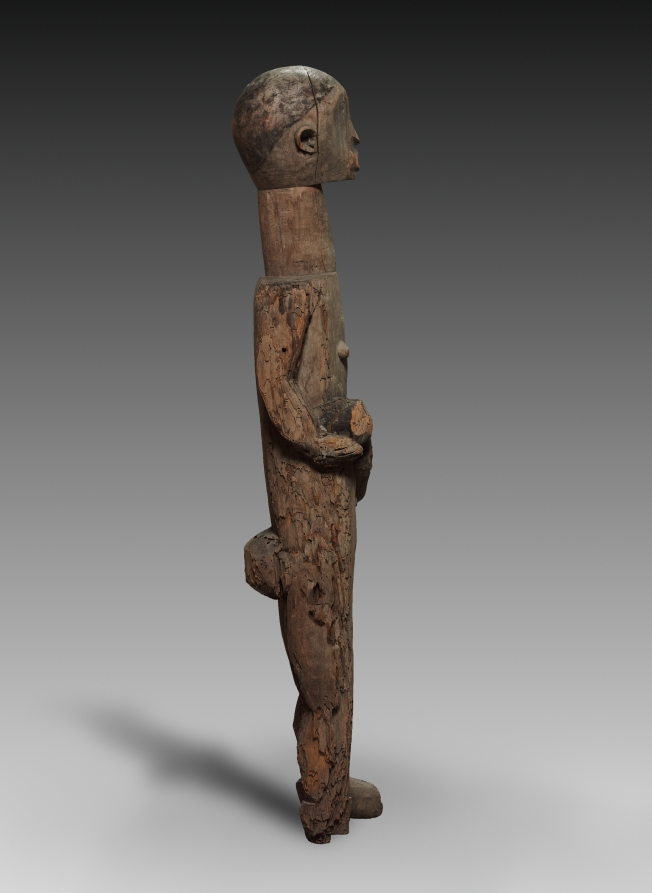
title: Figure of a Pair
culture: Africa, Central Africa, Democratic Republic of the Congo or Central African Republic (most likely), possibly Monzombo-style maker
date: late 1800s–early 1900s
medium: Wood and iron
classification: Sculpture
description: The Ubangi region's history of successive migrations and assimilations has resulted in numerous exchanges of religious beliefs and ritual practices. Despite some stylistic traits, including the heart-shaped faces and the male's crested coiffure, this figure with its female pair is unlike any other in the Ubangian corpus. Based on indirect evidence, the pair is said to represent the culture's primordial couple.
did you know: There are no other carved mother-child figures that originate from the Monzombo ethnic group.